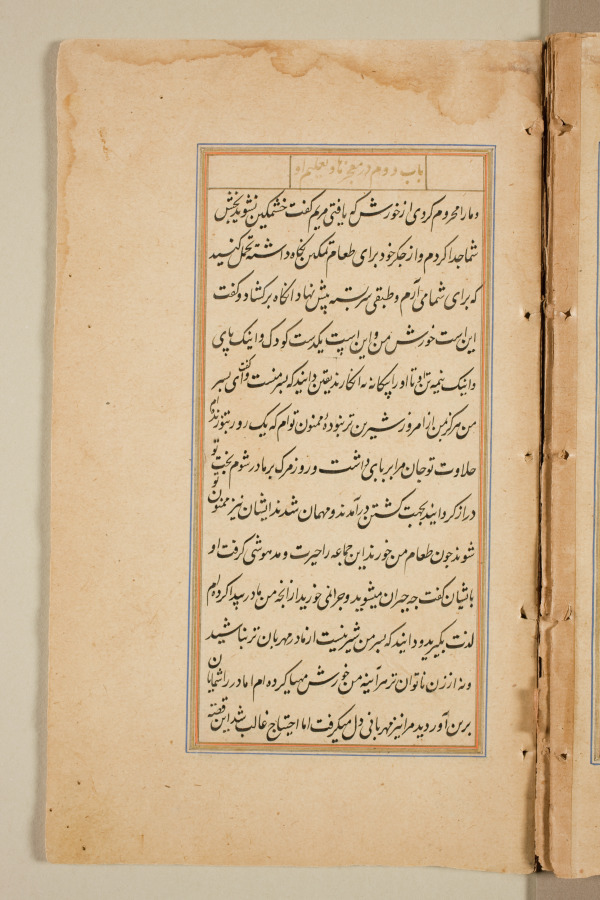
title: Text page from a Mirror of Holiness (Mir’at al-quds) of Father Jerome Xavier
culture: Mughal India, Allahabad, made for Prince Salim (1569–1627)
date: 1602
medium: Ink and gold on paper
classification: Manuscript